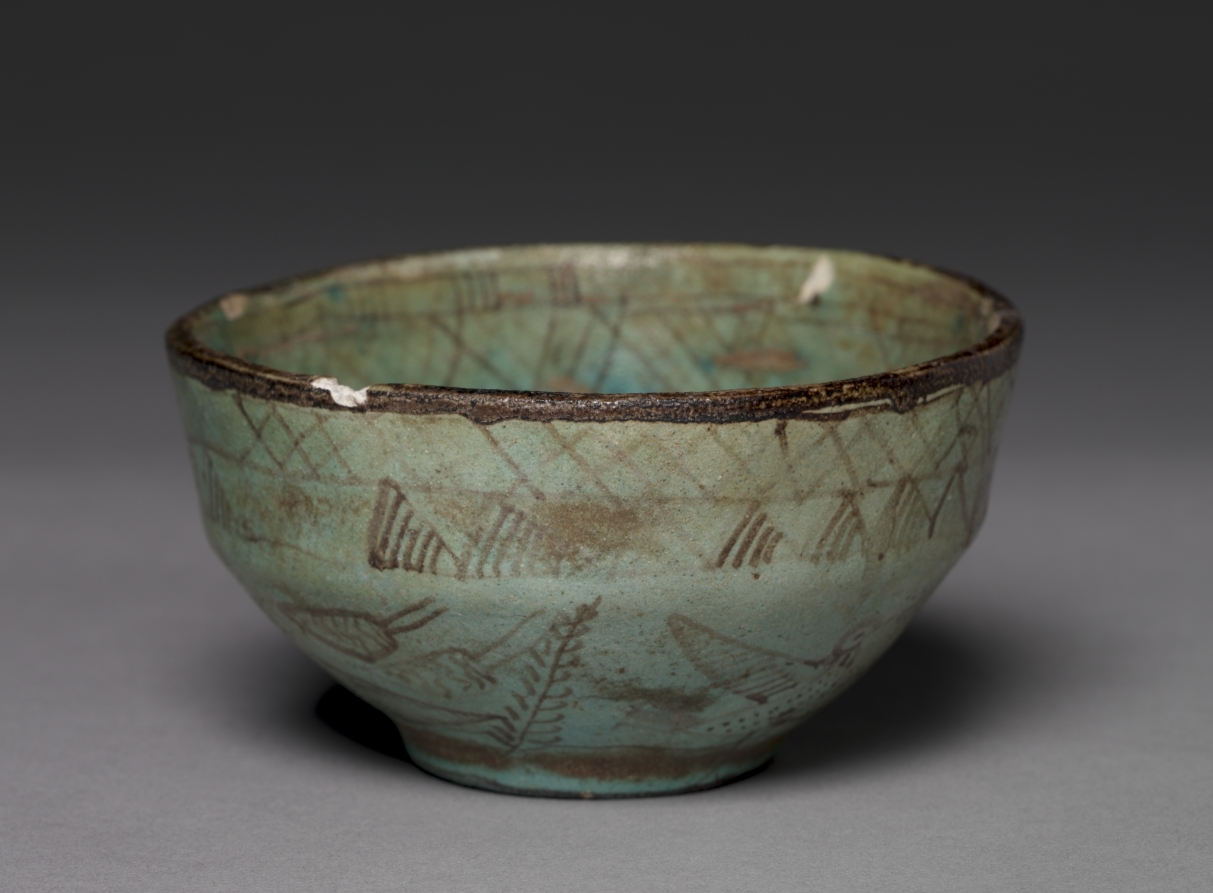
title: Decorated Bowl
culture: Egypt, Middle Kingdom (2040–1648 BCE)–New Kingdom (1540–1069 BCE)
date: 1980–1801 BCE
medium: turquoise faience with black painted decoration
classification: Vessels